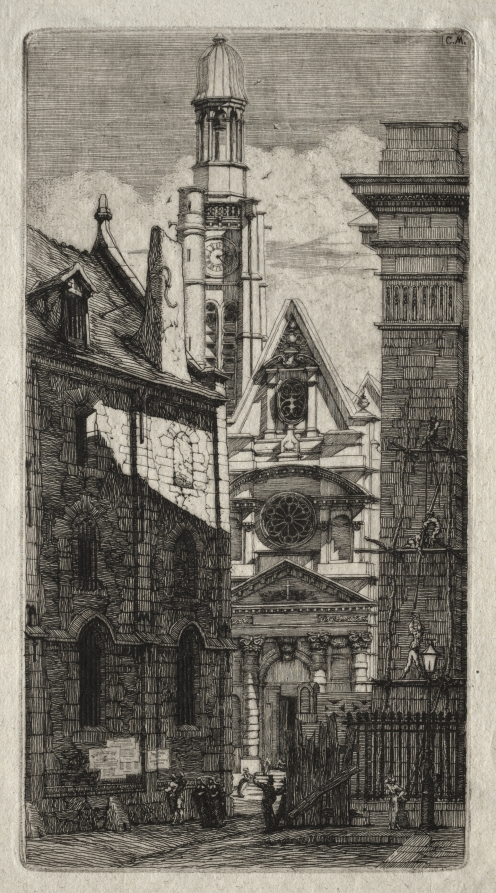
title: Etchings of Paris: Church of St. Stephen of the Mount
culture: France, 19th century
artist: Charles Meryon (French, 1821–1868)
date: 1852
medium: etching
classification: Print